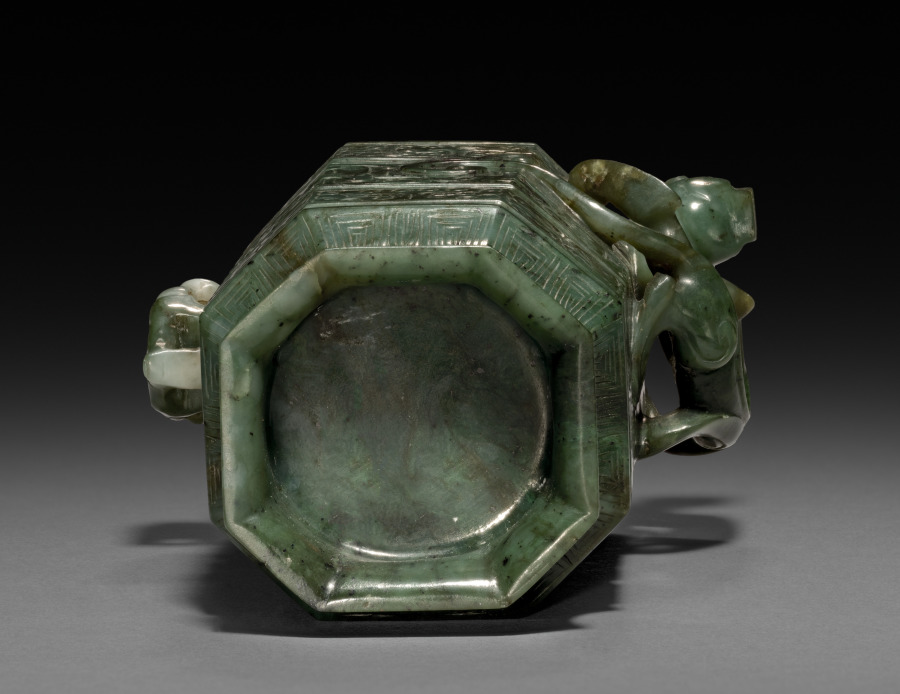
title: Octagonal Ewer with Dragon Handle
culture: China, Qing dynasty (1644–1911), Qianlong reign (1736–95)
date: 1736–95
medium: jade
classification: Jade